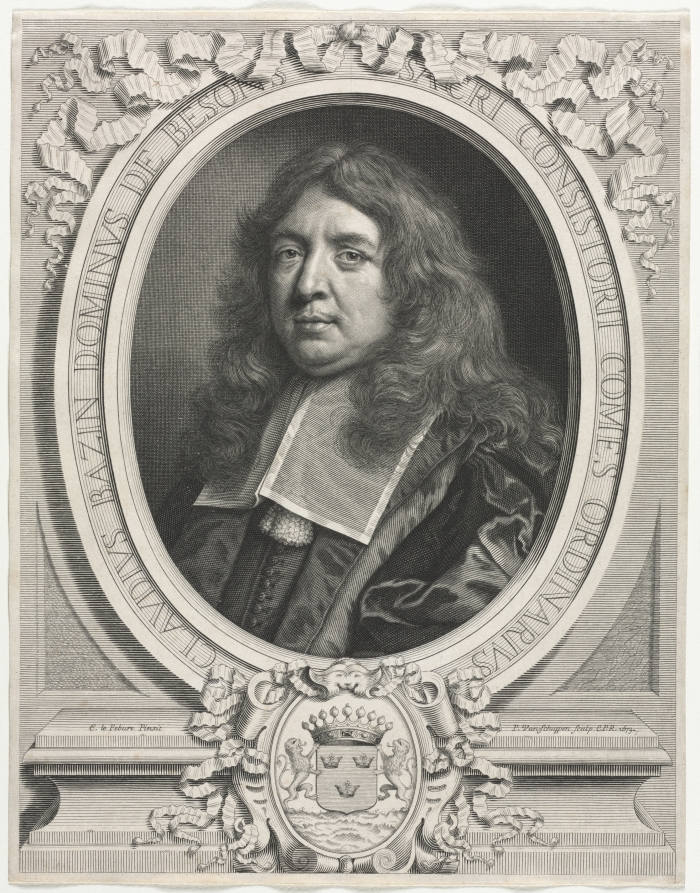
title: Bazin de Besons, Claude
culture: Flanders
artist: Pierre Louis van Schuppen (Flemish, 1627–1702)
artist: after François Le Febure (French)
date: 1673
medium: engraving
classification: Print